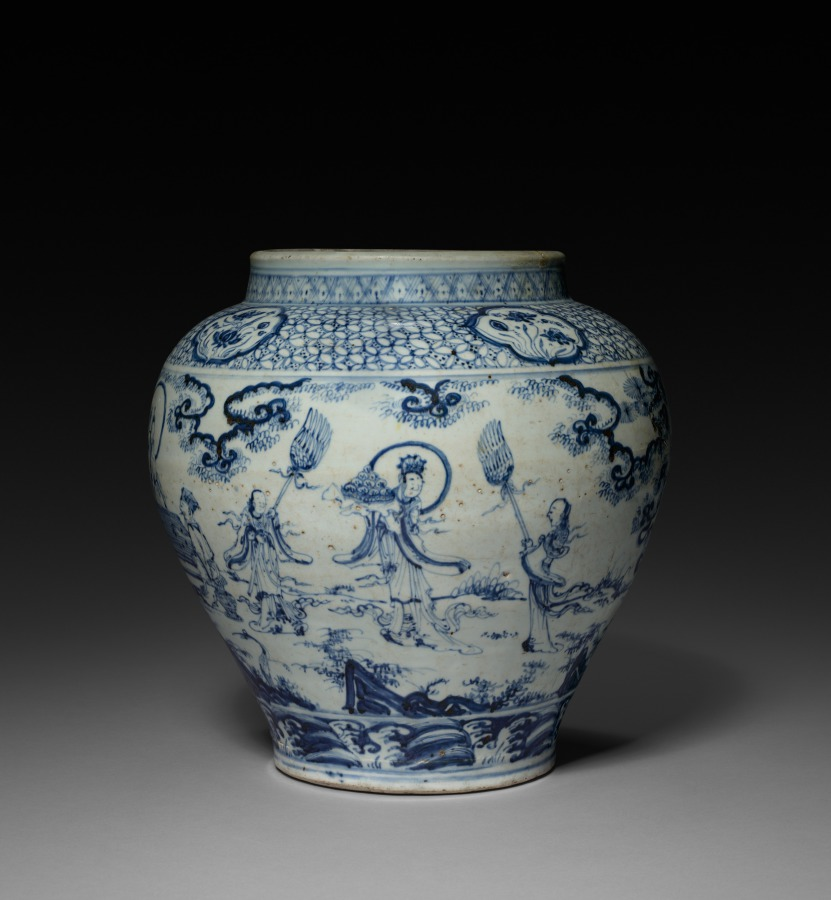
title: Jar with Scenes from the Land of Daoist Immortals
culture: China, Ming dynasty (1368–1644)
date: early 1400s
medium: porcelain with underglaze blue decoration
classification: Ceramic